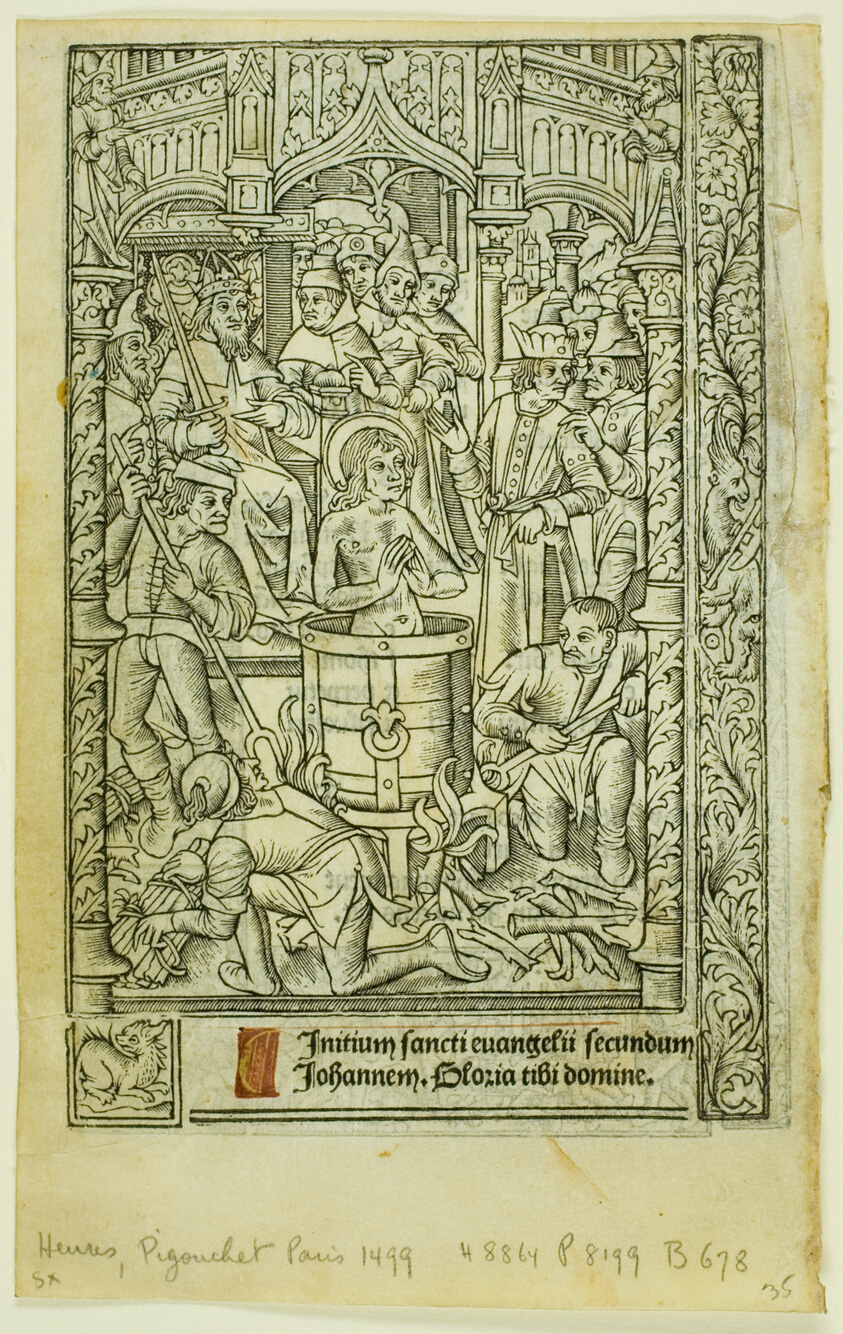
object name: Print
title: The Martyrdom of Saint John the Evangelist (recto), and December Calendar (verso), from Book of Hours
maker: Philippe Pigouchet (French, active 1488-1518); published by Simon Vostre (French, active 1486–1518)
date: 1496/97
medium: Metalcut and letterpress in black with rubrication (recto/verso) on vellum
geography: France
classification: woodcut; print; prints and drawing